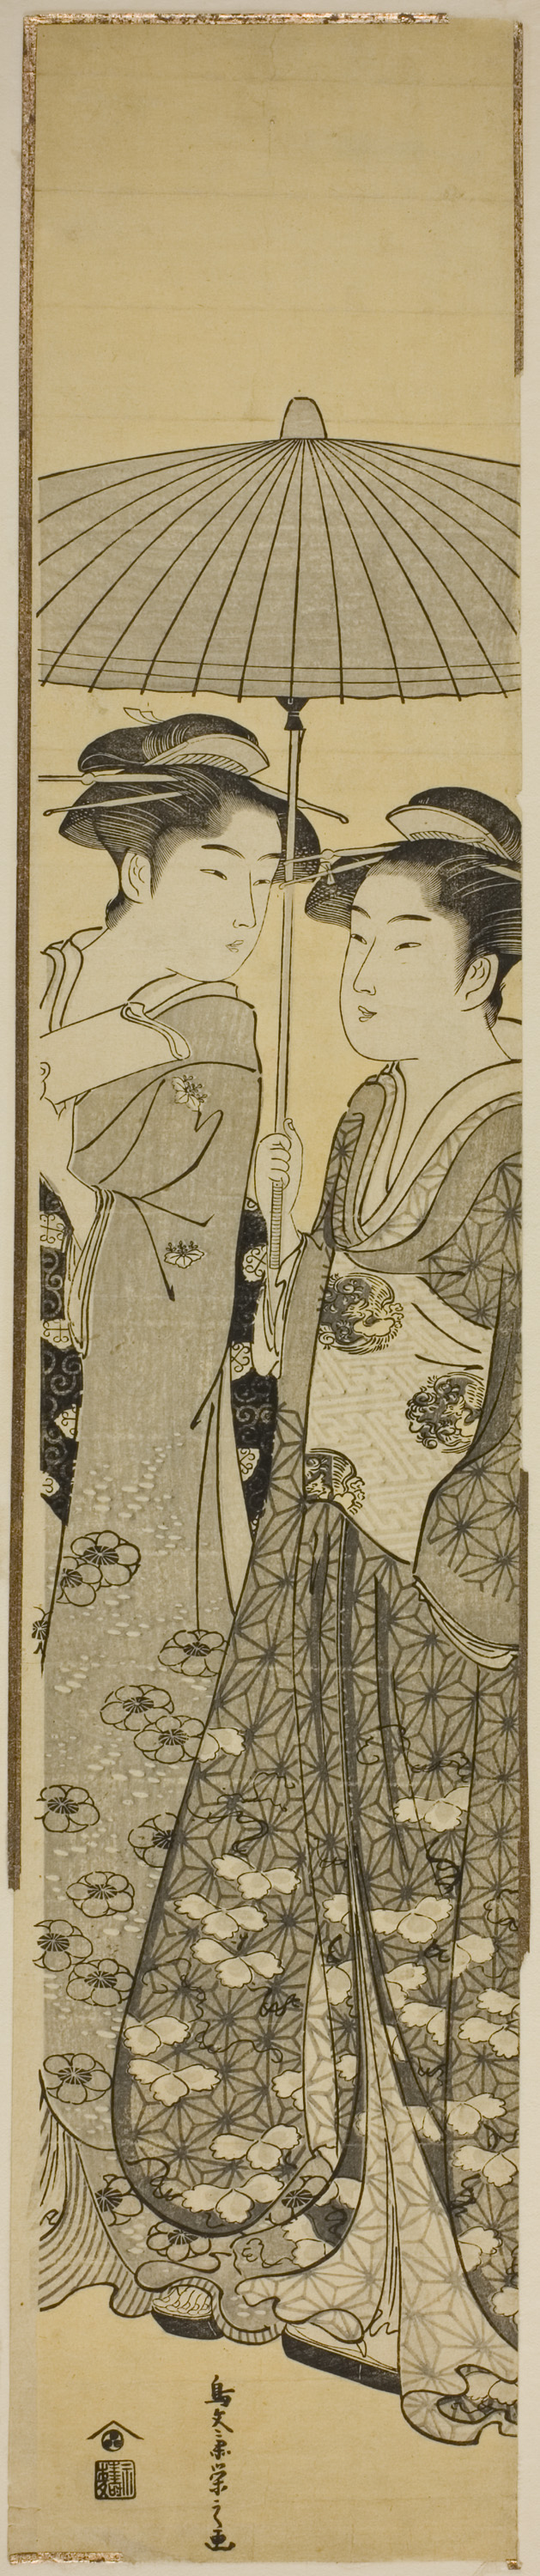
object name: Print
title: Two Girls under an Umbrella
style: Japanese (culture or style)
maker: Chobunsai Eishi; Japanese, 1756-1829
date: c. 1788/89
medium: Color woodblock print; hashira-e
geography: Japan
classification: woodblock print; print; asian art